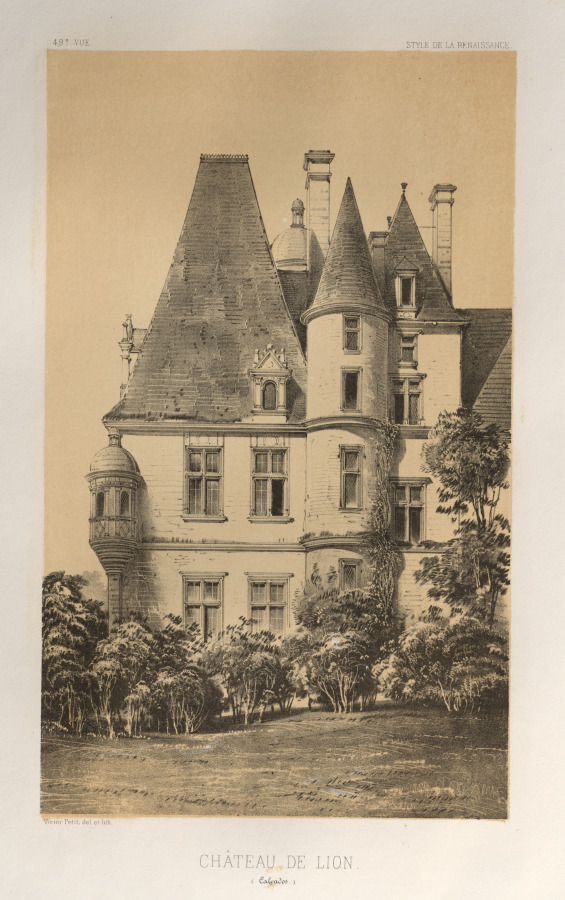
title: Architecture Pittoresque ou Monuments des XVeme. Et XVIeme. Siecles: Chateaux de France des XV et XVI Siecles: Pl. 49, Château De Lion (Calvados)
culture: France, 19th century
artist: Victor Petit (French, 1817–1874)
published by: Charles Boivin (publisher and editor); Lith de Godard a Paris (printer)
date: 1860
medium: lithograph with tint stone, from portfolio of 100 lithographs with tint stone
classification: Print